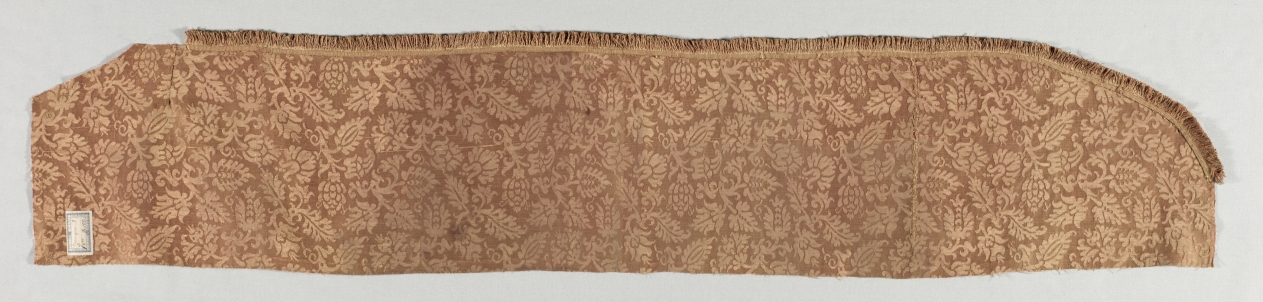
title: Textile Fragment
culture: Italy, 16th-17th century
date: 1500s - 1600s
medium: silk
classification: Textile